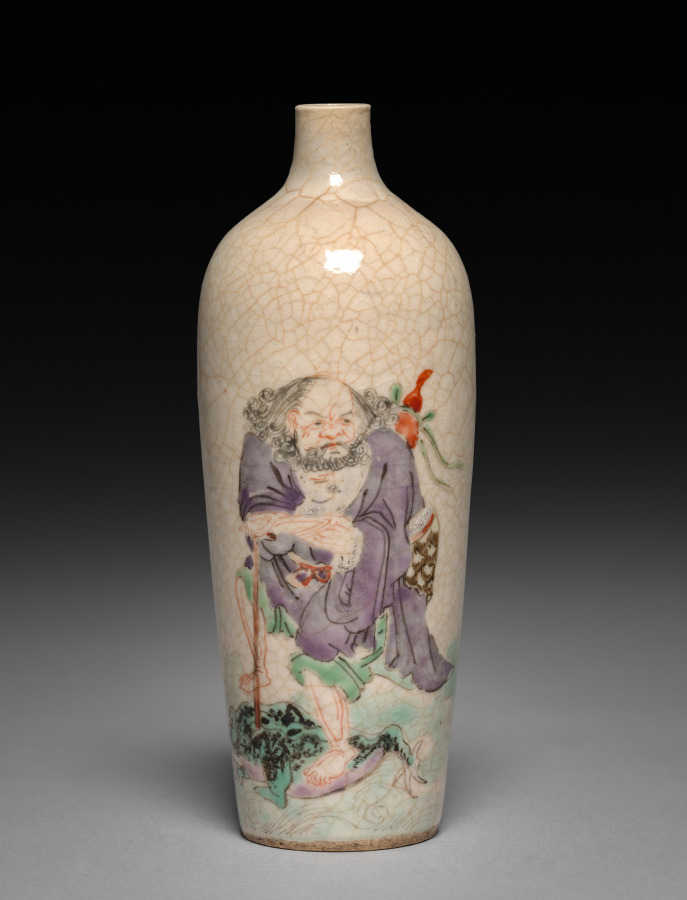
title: Snuff Bottle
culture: China, Qing dynasty (1644–1911), Qianlong reign (1736–95)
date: 1736–95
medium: porcelain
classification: Ceramic